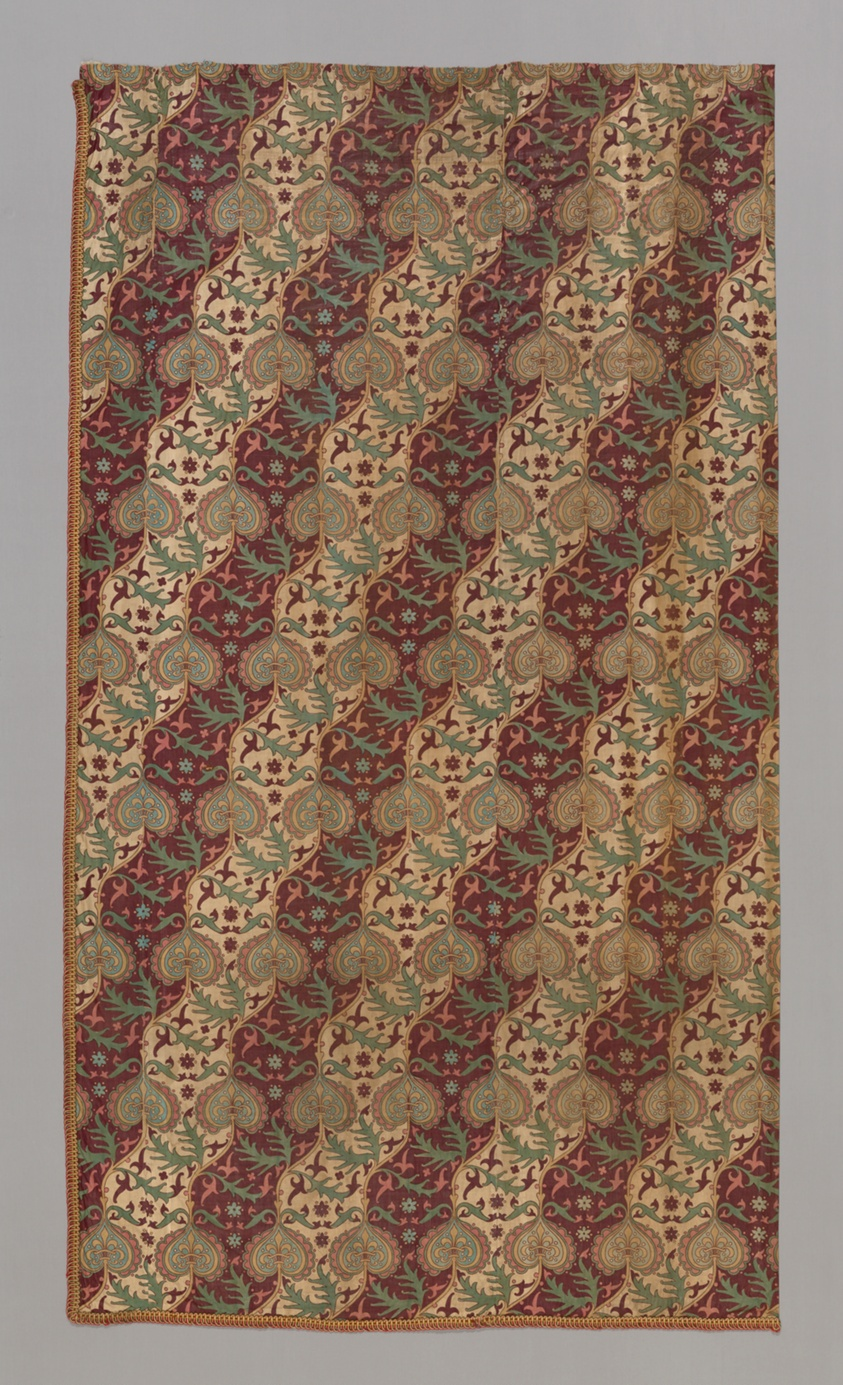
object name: Textile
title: Panel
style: gothic revival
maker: Designed by Augustus Welby Northmore Pugin (English, 1812–1852); Produced by Bannister Hall Printworks; England, Lancashire, Preston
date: 1849/51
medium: Cotton, plain weave; block or roller printed; glazed; edged with wool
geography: England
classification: textile; weaving - printed; weaving